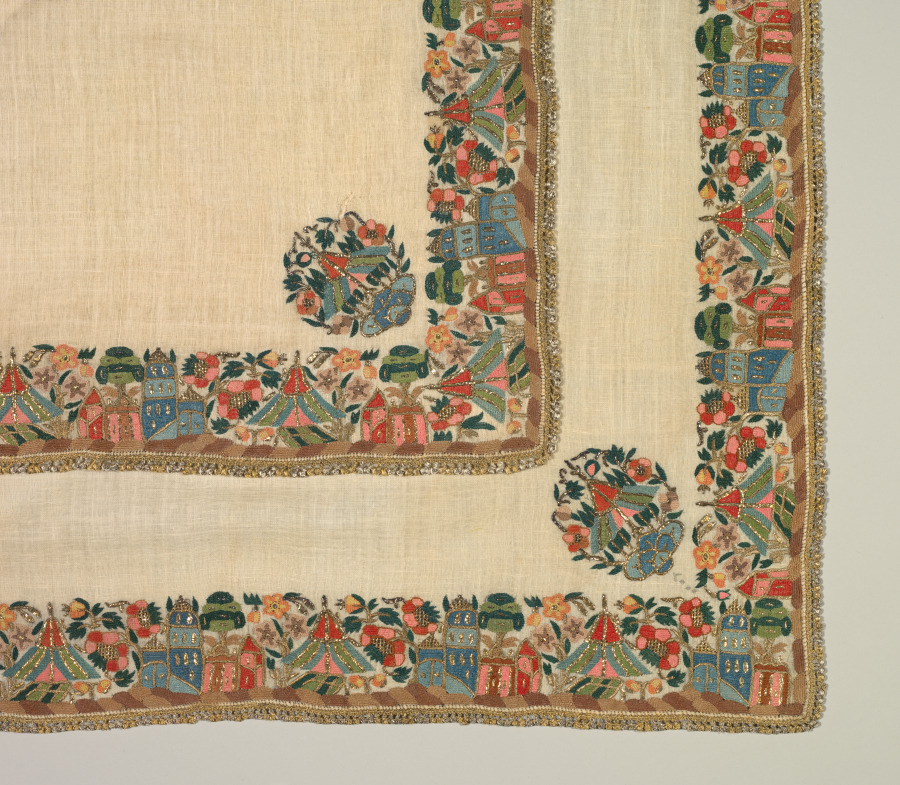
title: Embroidered head scarf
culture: Turkey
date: 1800s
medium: plain weave: linen; embroidery, double-running stitch: silk, gilt-metal strips and thread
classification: Embroidery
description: The edges of this headscarf are embroidered with landscape: a mosque alternates with a Turkish tent with a flowering plant between. In each corner is a medallion formed by a flowering plant surrounding a Turkish tent.